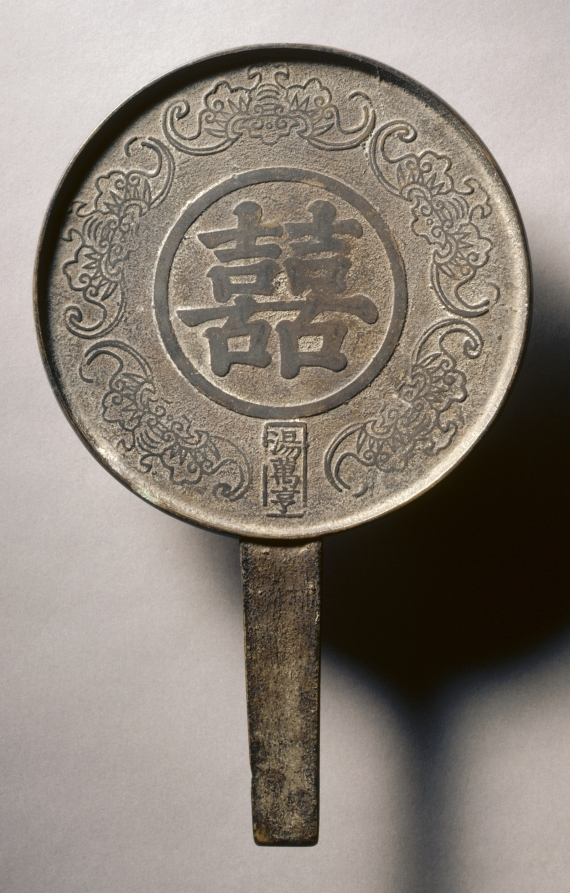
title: Mirror with Handle, Decorated with "Double Happiness" and Five Bats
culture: China, Qing dynasty (1644-1911)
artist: workshop of Tang Wanheng (Chinese, active c. 1800)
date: c. 1800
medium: brass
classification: Metalwork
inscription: 雙喜， 湯萬亨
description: This mirror bears a large character of xi 囍 ("double happiness," as in a marriage) as its principal decoration. Below that, a smaller inscription in a rectangular frame establishes the mirror maker's identity. Tang Wanheng 湯萬亨 must have enjoyed a lucrative trade and sufficient renown to warrant the inclusion of his name on his products. It has been suggested that these mirrors were not so much made for reflective purposes as for ritualistic use during the marriage ceremony, hence the "double happiness" as its main decoration.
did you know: The five–bat design signals a wish for good fortune.